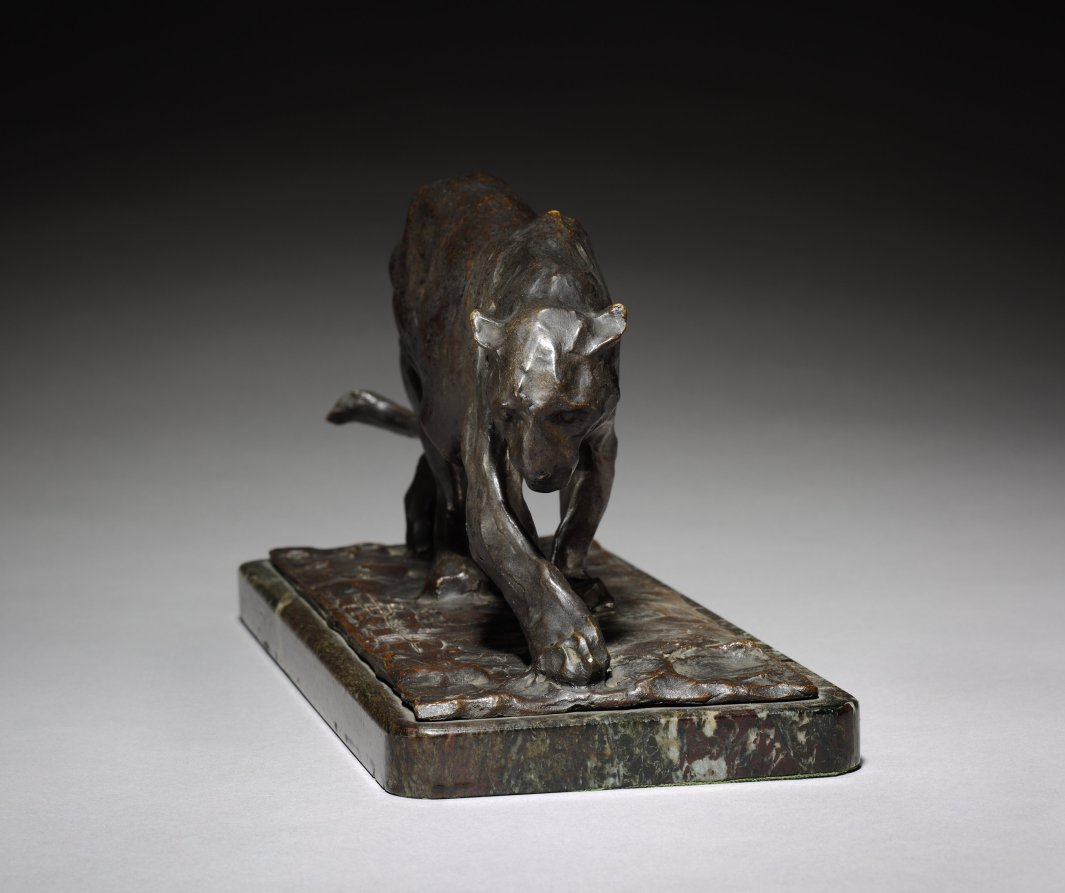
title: Walking Panther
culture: Italy, active in France, early 20th Century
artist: Rembrandt Bugatti (Italian, 1884–1916)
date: 1903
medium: bronze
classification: Sculpture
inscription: signed: R. Bugatti, stamped A. A. Hebrard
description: Panthers were among the first wild animals depicted by Rembrandt Bugatti after his encounter with them in the French national zoo, at the Jardin des Plantes in Paris.